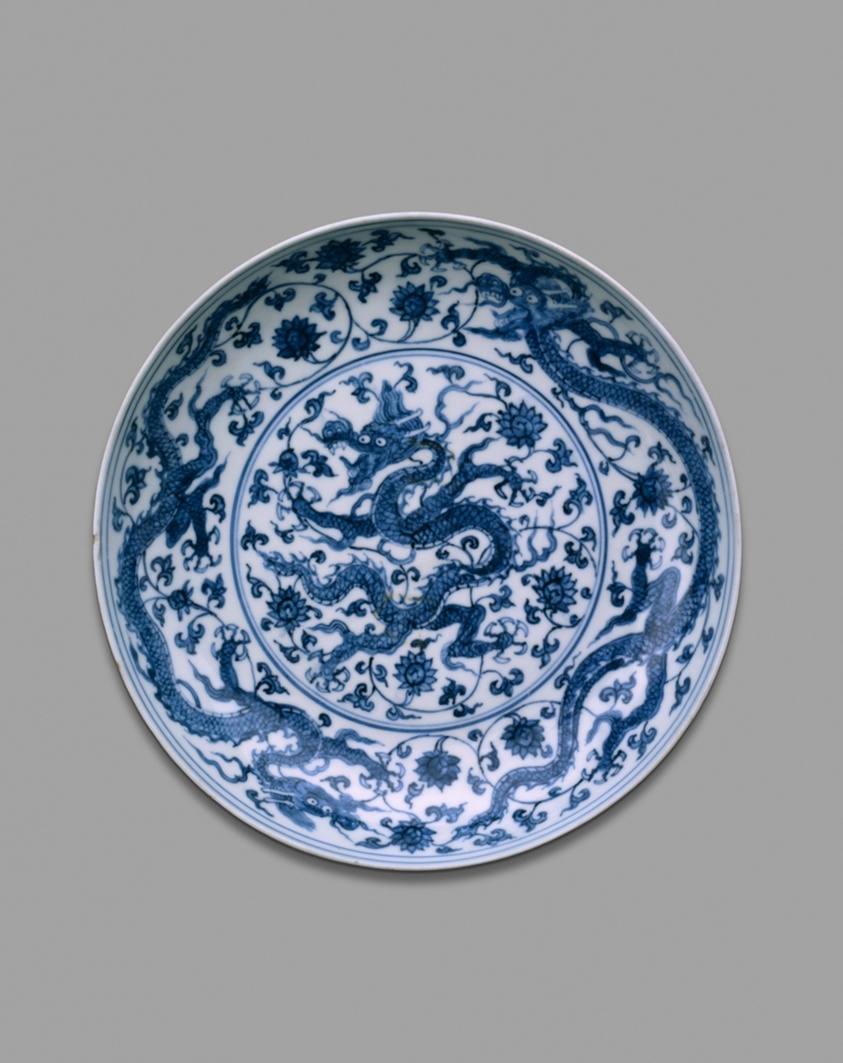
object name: Decorative Arts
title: Dish with Dragons Writhing amid Floral Scrolls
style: Chinese (culture or style)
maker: China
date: Ming dynasty (1368–1644), Zhengde reign mark and period (1506–1521)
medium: Porcelain painted in underglaze blue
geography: China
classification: dish (vessel); porcelain; asian art; ceramics; decorative arts